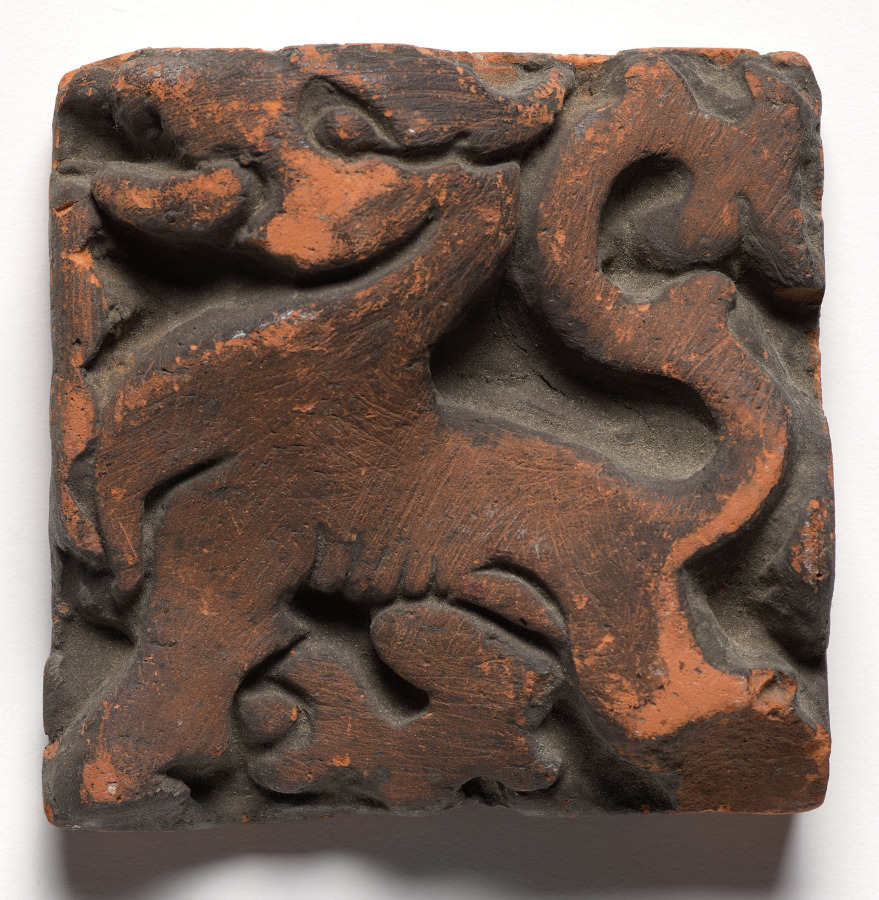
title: Tile- Hippogriff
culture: America, Pennsylvania, Doylestown, Early 20th century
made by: Moravian Pottery and Tile Works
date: before 1920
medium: unglazed terracotta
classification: Ceramic